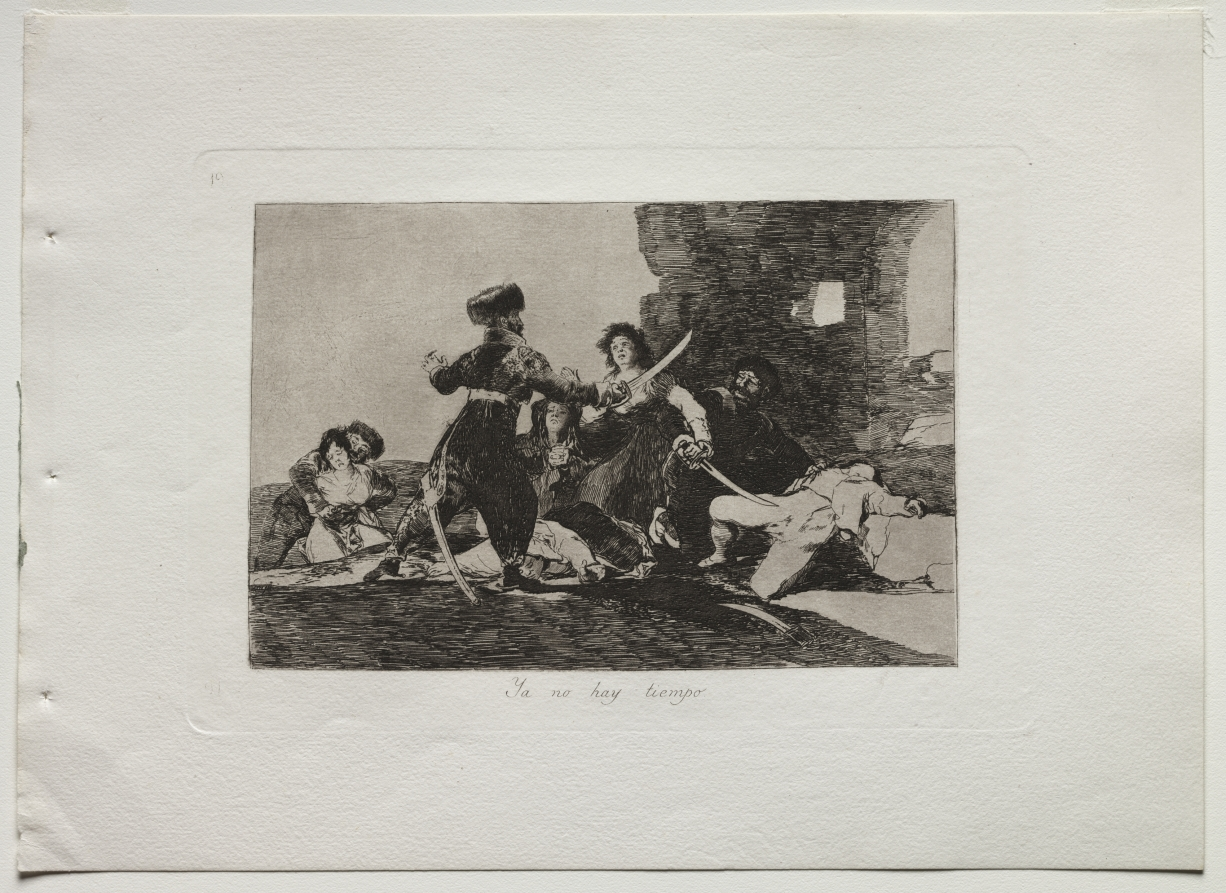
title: Disasters of War: There isn't Time Now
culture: Spain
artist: Francisco de Goya (Spanish, 1746–1828)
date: 1810–20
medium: etching, drypoint, lavis, and engraving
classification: Print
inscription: title printed below the image: "Ya no hay tiempo;" "#19" printed top left